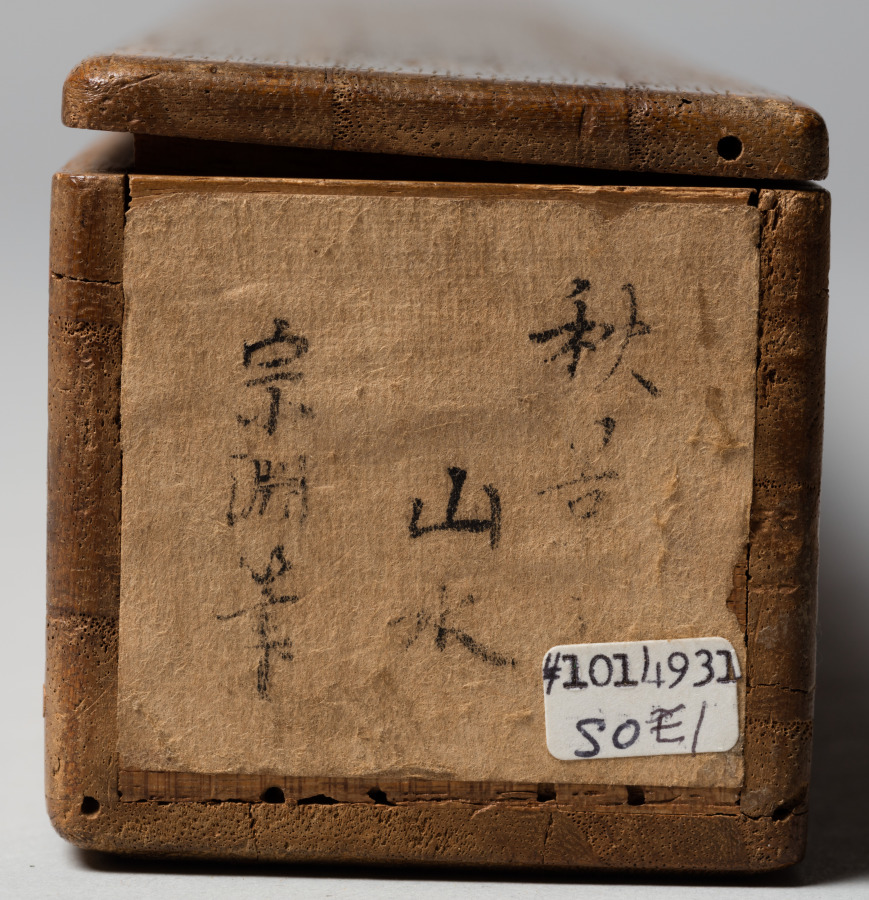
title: Chinese Literatus in an Autumn Landscape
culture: Japan, Muromachi period (1392–1573)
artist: Josui Sōen (Japanese, active c. 1489–1500)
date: late 1400s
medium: hanging scroll; ink on paper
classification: Painting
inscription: Signed: "Sō'en" 宗淵. Sealed: "Josui" 如水; one seal unread.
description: In this painting, Sesshū Tōyō’s disciple Sōen depicts a Chinese scholar-official astride a donkey with his attendant behind. Framing their passage on the right side of the scene are two bare willows, and on the left, geese in flight, the cries of which capture the pair’s attention. These elements suggest that the season is late autumn. Sōen, who famously received Sesshū’s 1495 Splashed-ink Landscape as a certificate of his success as a pupil, studied with the master in Suō, presentday Yamaguchi, after which he returned to his native province in the Kanto region.